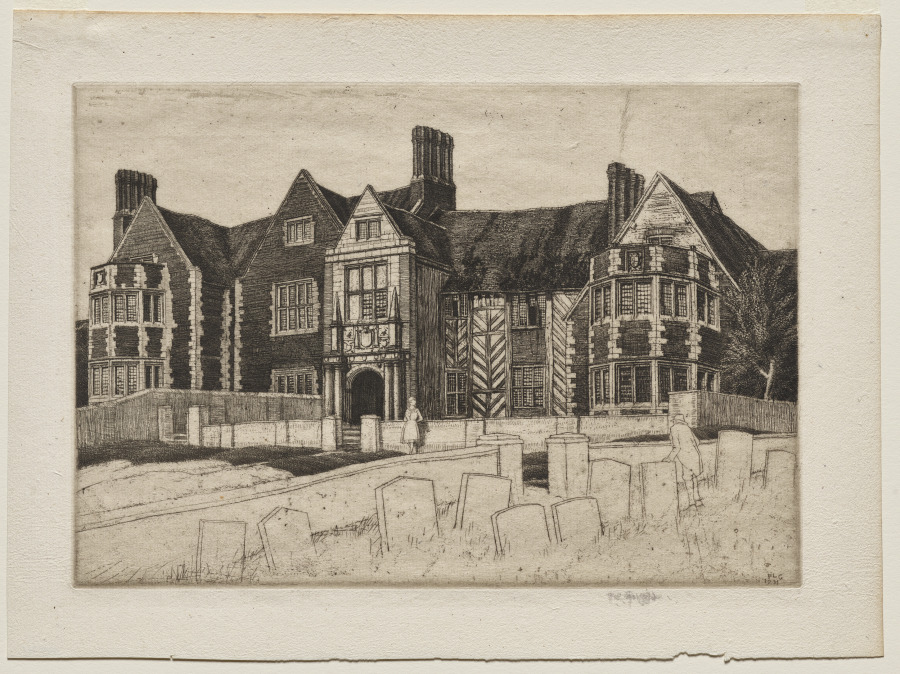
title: Ragdale Hall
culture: England, 20th century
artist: Frederick Landseer Maur Griggs (British, 1876–1938)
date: 1937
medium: etching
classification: Print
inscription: signed in graphite, lower right margin: F.L. Griggs